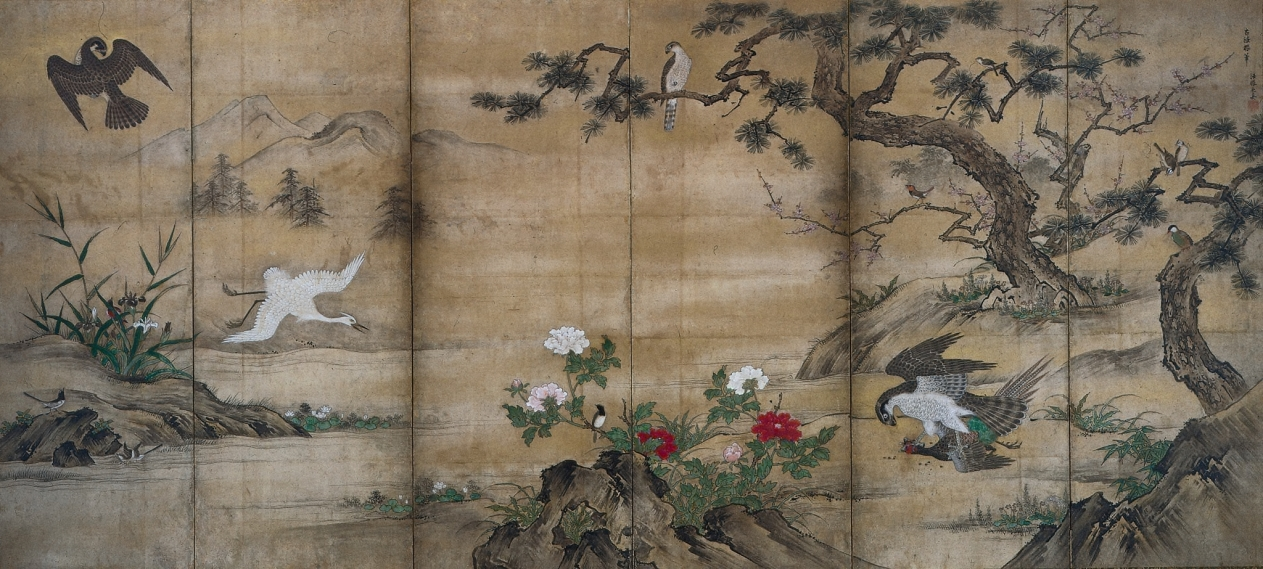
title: Birds and Flowers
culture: Japan, Momoyama period (1573–1615)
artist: attributed to Kano Shōei (Japanese, 1519–1592)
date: late 1500s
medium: One of a pair of six-panel folding screens; ink, color, and gold on paper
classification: Painting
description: The landscape depicted in this pair of screens follows a seasonal progression from right to left, starting with the blossoming plum of early spring and ending with late autumn peonies. A variety of smaller birds are positioned throughout the scene, and a trio of swimming ducks is bracketed by early summer irises and early autumn bellflowers at the center. While some raptors (birds of prey) terrorize a pheasant and an egret (a waterfowl) to the right, a peacock and peahen converse to the left. Hawks are associated with military prowess, while the peafowl suggest cultural prestige.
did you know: Military class patrons frequently requested scenes depicting predation, such as hunting scenes that were inserted as additional subject matter in otherwise tranquil vistas celebrating flora and fauna.